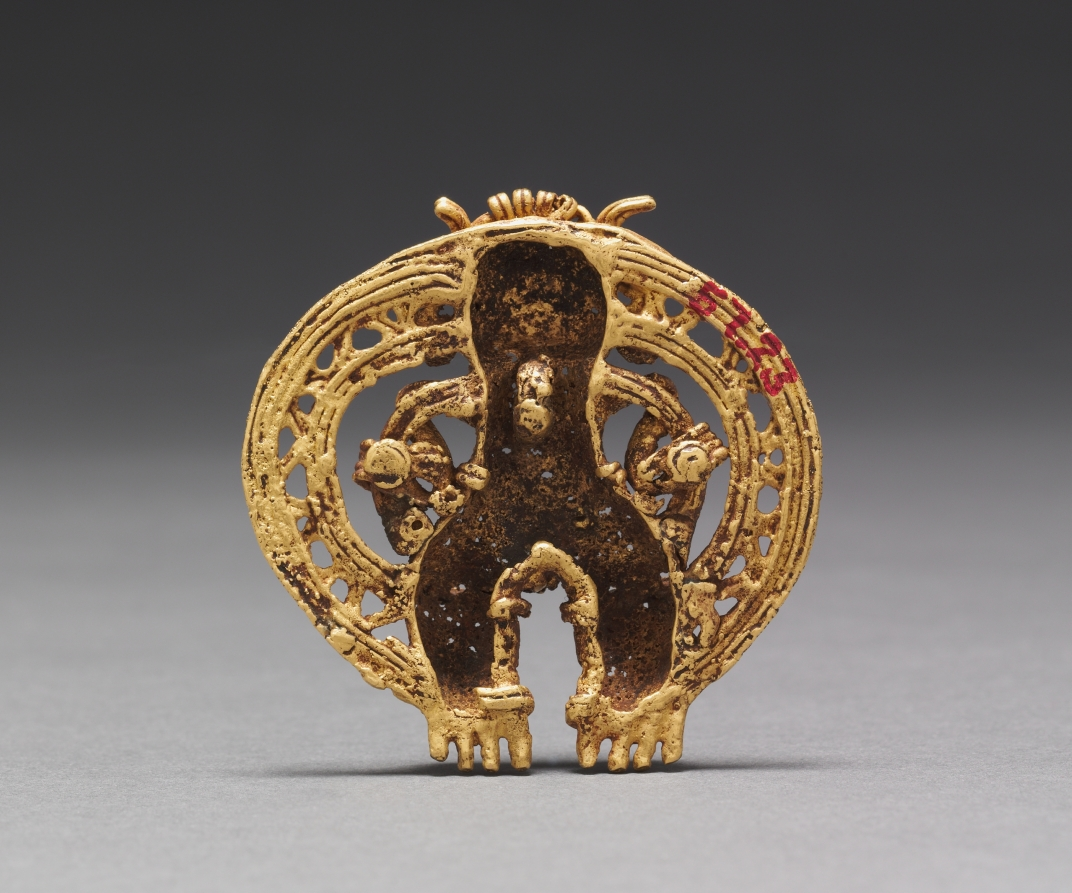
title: Figure Pendant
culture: Southern Costa Rica, (Diquís Region), Diquís Style, 11th-16th century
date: c. 1000–1550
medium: cast gold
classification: Metalwork